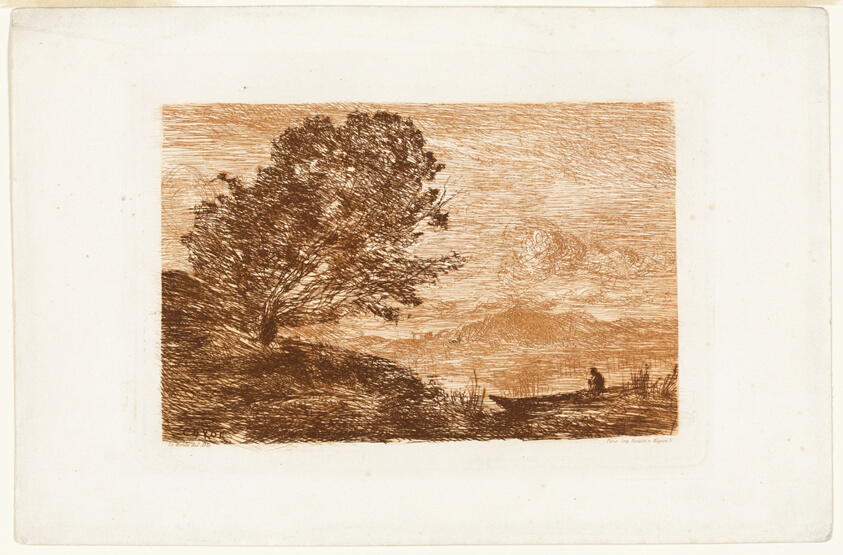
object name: Print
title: Lake in the Tyrol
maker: Jean-Baptiste-Camille Corot (French, 1796-1875); printed by François Houiste; published by Le Monde des Arts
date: 1863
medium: Etching in red on white wove paper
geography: France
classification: etching; paper; print; prints and drawing